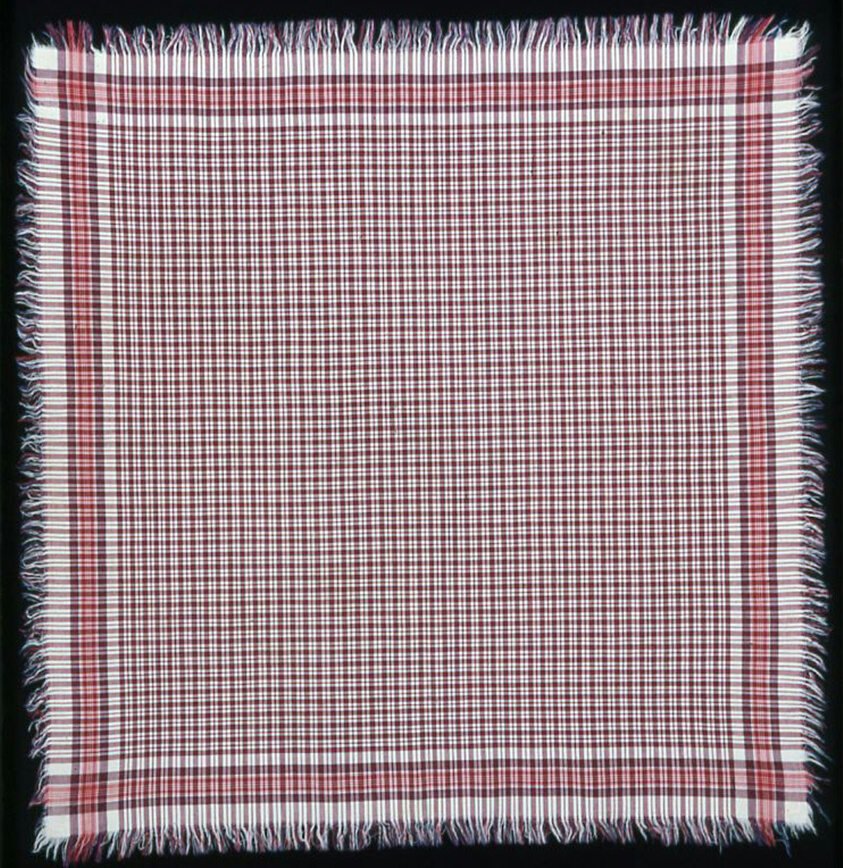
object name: Textile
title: Handkerchief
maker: Sweden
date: 1801/25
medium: Cotton, plain weave; main warp and ground weft cut fringe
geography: Sweden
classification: textile; weaving; accessories (object genre)